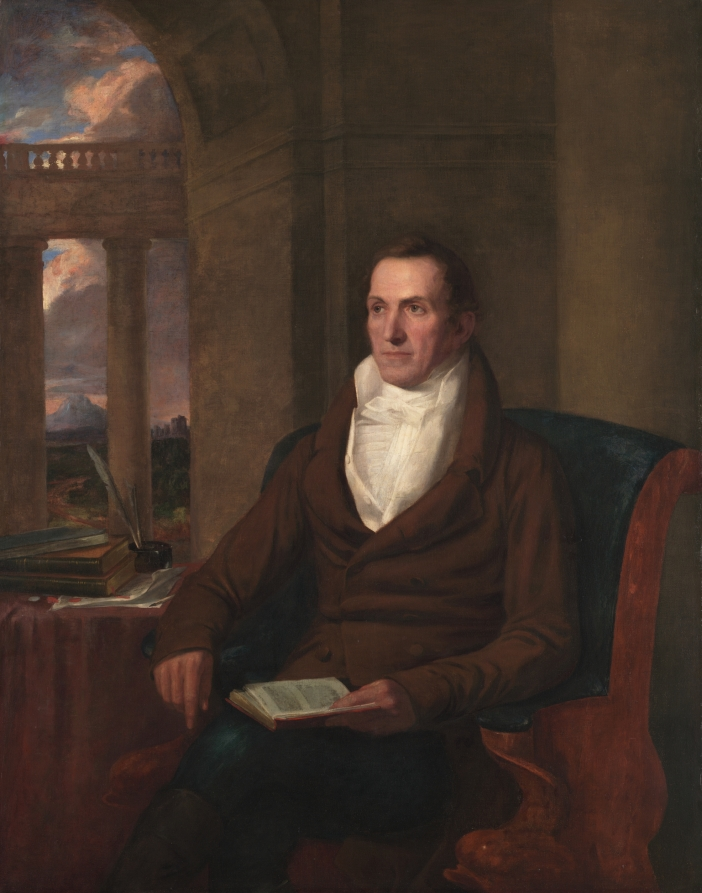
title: Samuel Williams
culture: America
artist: Washington Allston (American, 1779–1843)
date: c. 1817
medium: oil on canvas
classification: Painting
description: Allston’s portrait of his London banker and business agent explores the experience of reverie. Williams looks off absently, perhaps inspired by the pictures in the book he holds. With its view of an Italianate landscape beyond the columns of this invented setting, the painting seemingly invites viewers to join the sitter in dreaming about faraway places.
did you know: Allston experimented with painting recipes, even attempting to mix his pigment colors with skimmed milk.